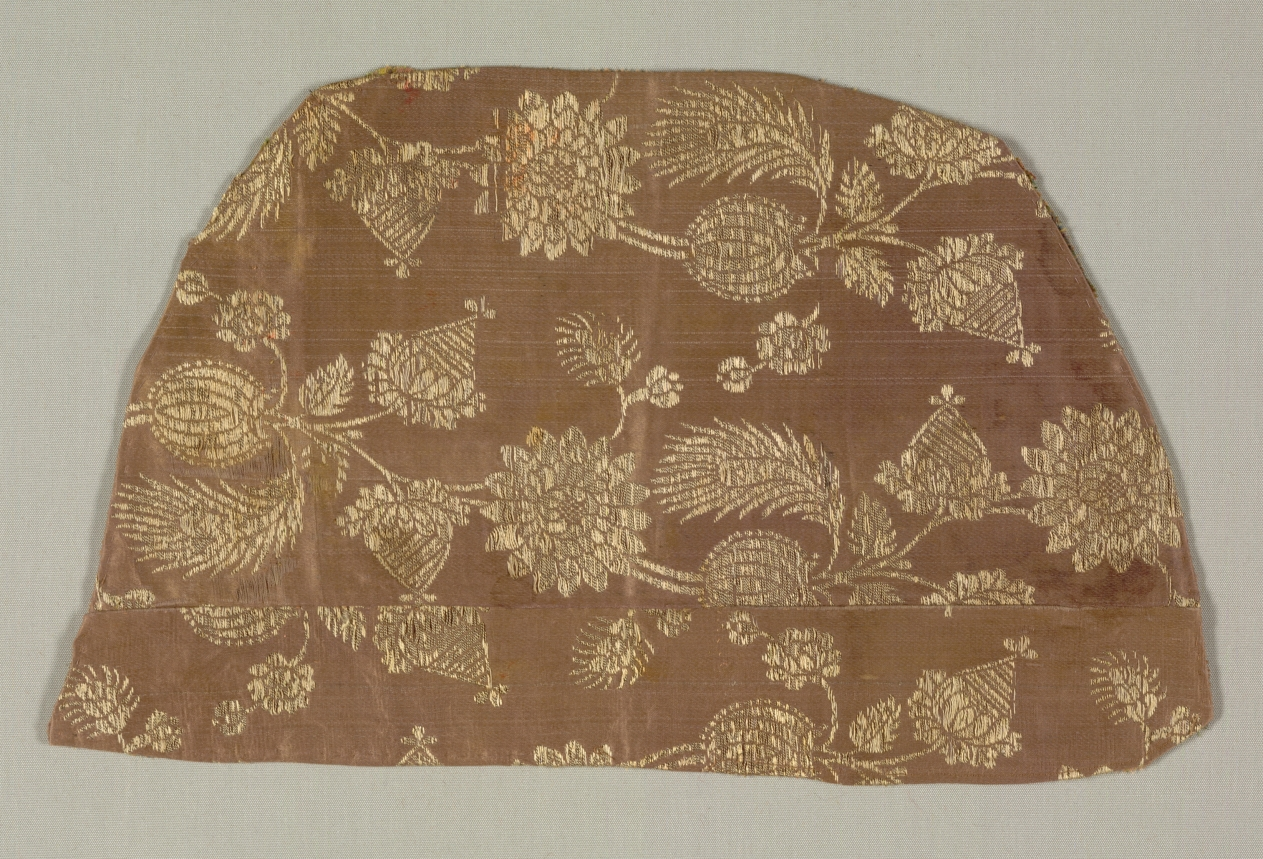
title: Fragment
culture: Iran, Safavid period (1501–1722)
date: 1600s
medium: silk: compound twill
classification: Textile